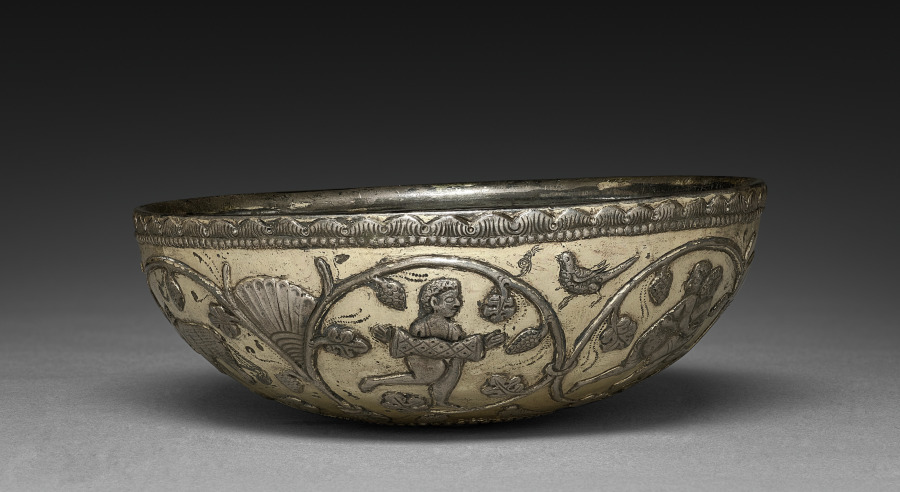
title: Bowl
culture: Iran, Sasanian Empire (224–651 CE)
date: 500–700 CE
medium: silver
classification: Metalwork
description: Every good Zoroastrian was supposed to spend one-third of his day farming; one-third philosophizing; and one-third eating, resting, and at pleasure. The abundance of Sasanian luxury goods is evidence of the importance accorded the last third of the day.